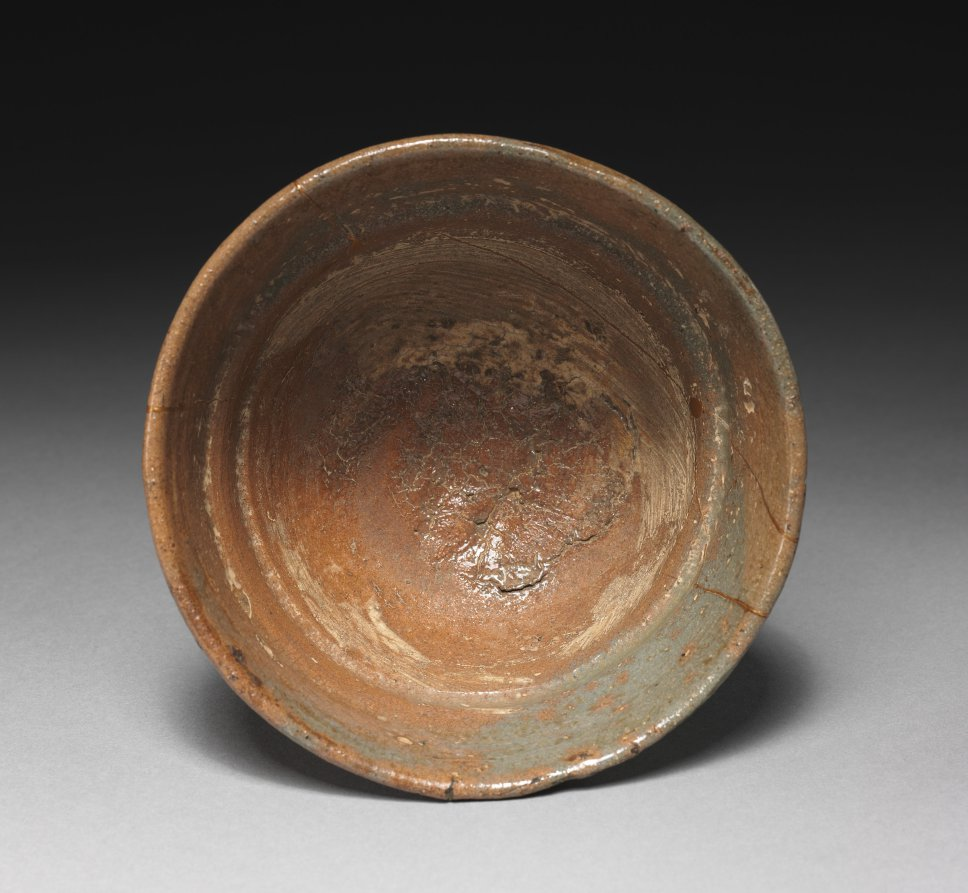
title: Tea Bowl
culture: Korea, Joseon dynasty (1392–1910)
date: 1600s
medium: glazed stoneware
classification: Ceramic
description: This type of wide-mouthed bowl was used every day in Korea, not exclusively for tea drinking. But when it was introduced to Japan around the early 16th century, its imperfect appearance, which evokes the aesthetics of wabi-sabi, caused it to be repurposed as a tea bowl. Korean tea bowls were circulated as a item of foreign luxury among Japanese military elites. This type of tea bowl may have been produced in one of the kilns established and operated by the trading office (Waegwan) in Busan, southern Gyeongsang province, as an export item for Japanese tea bowl collectors.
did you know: For its imperfect aesthetics, this type of rustic tea bowl was highly appreciated among advanced Japanese practitioners of the tea ceremony.